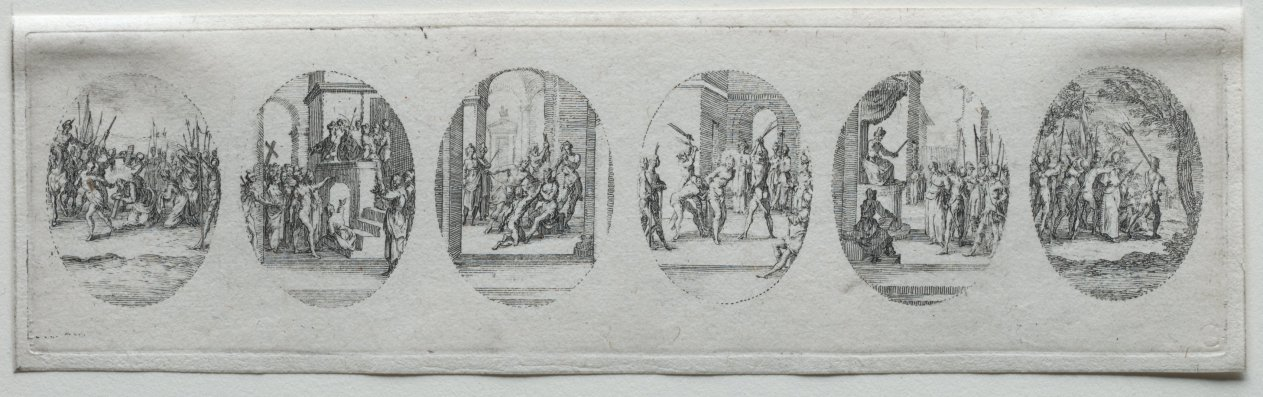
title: The Mysteries of the Passion: The Carrying of the Cross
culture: France, 17th century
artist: Jacques Callot (French, 1592–1635)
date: 1631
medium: etching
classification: Print